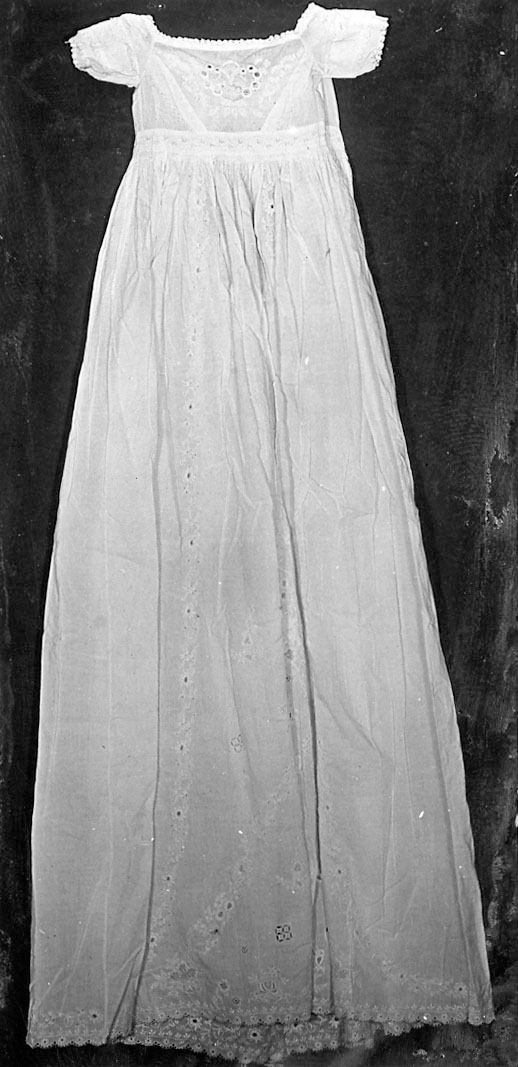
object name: Costume and Accessories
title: Baby's christening dress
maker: Scotland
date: c.1840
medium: Cotton, plain weave; embroidered and hemstitched with lace filling stitch; padded satin, slanted, overcast, stem, satin, drawn fillings, cutwork, pulled fillings, buttonhole, straight overcast and feather stitches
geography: Scotland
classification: textile; costume; dress (garment); clothing